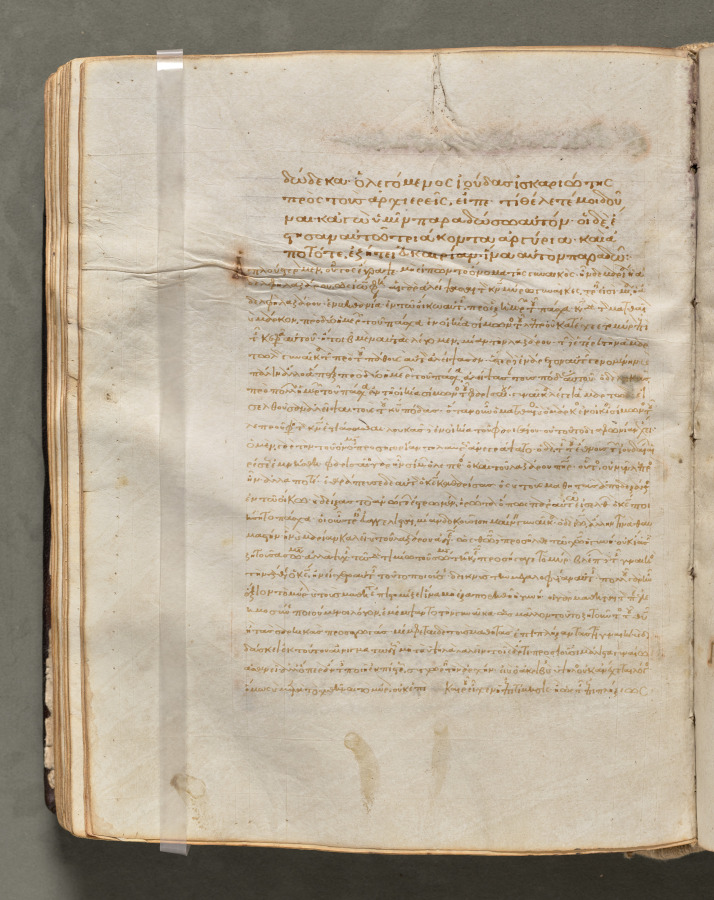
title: Text, folio 115 (verso), from a Gospel Book with Commentaries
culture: Byzantium, Constantinople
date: c. 1000–1100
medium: ink, tempera, and gold on vellum; leather binding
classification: Bound Volume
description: Each of the four gospels in this book opens on a page with brilliantly illuminated borders depicting the author of the text as well as birds-principally peacocks, symbols of the immortality of the soul-and fountains, representing the fountain of life and the salvation of the soul. This volume consists of 428 leaves with texts in Greek. Its level of sophistication suggests that it was probably written and decorated in a monastery in Constantinople.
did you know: Gospel Books were carried in procession through Byzantine churches.